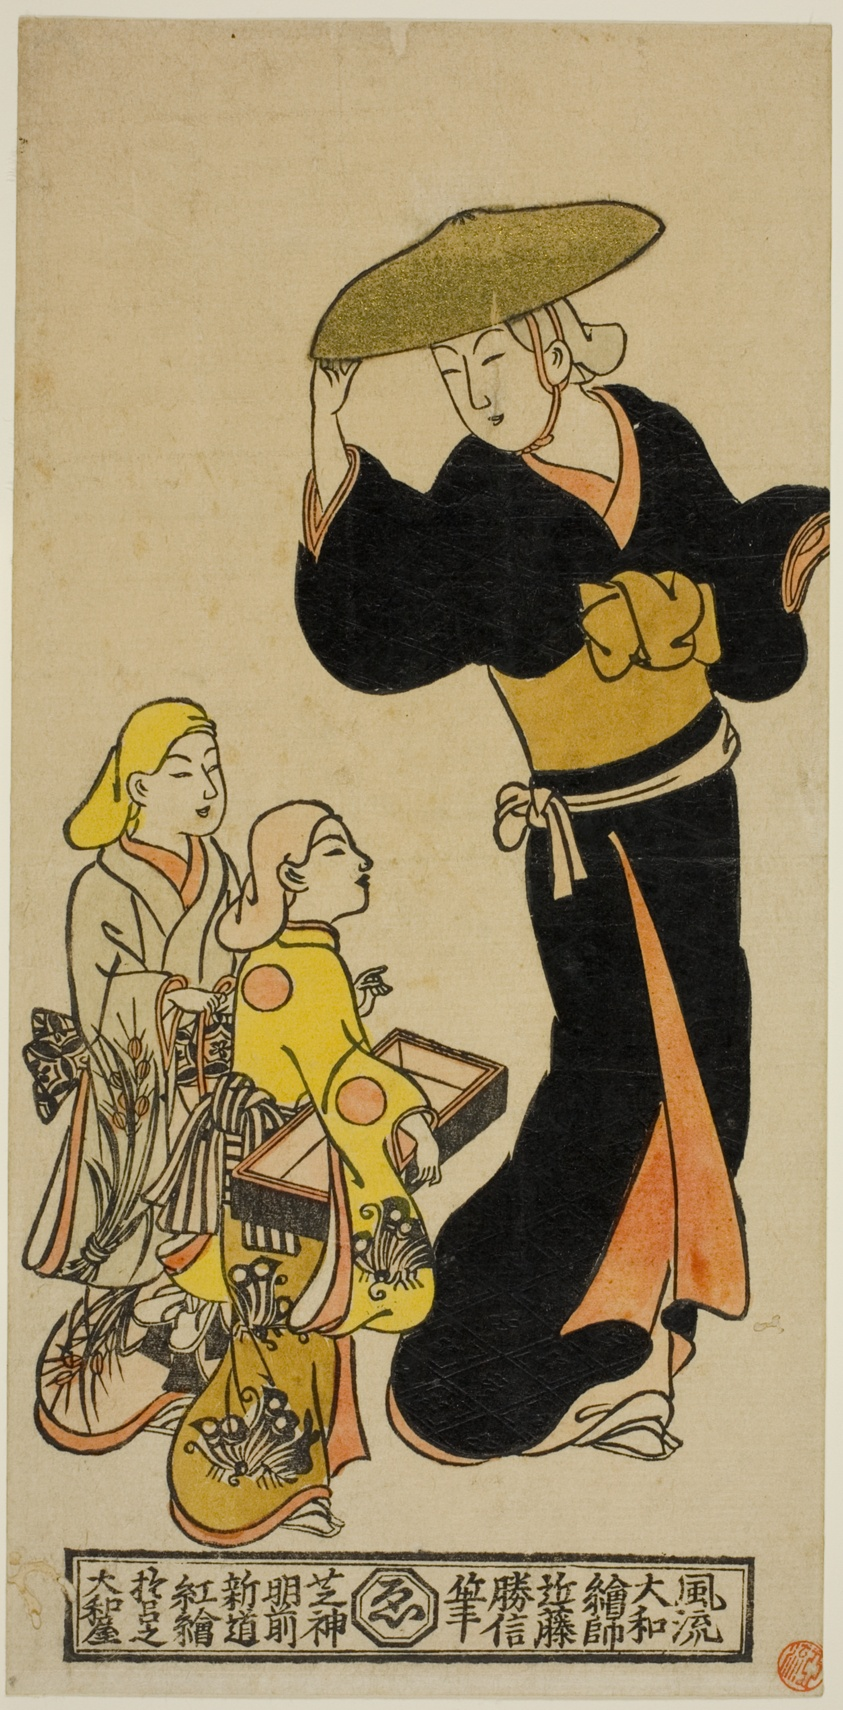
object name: Print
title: Wandering minstrels dressed as nuns (utabikuni)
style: Japanese (culture or style)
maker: Kondo Katsunobu (Japanese, active c. 1716-36)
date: c. 1716/36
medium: Hand-colored woodblock print; hosoban, urushi-e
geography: Japan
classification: woodblock print; print; asian art